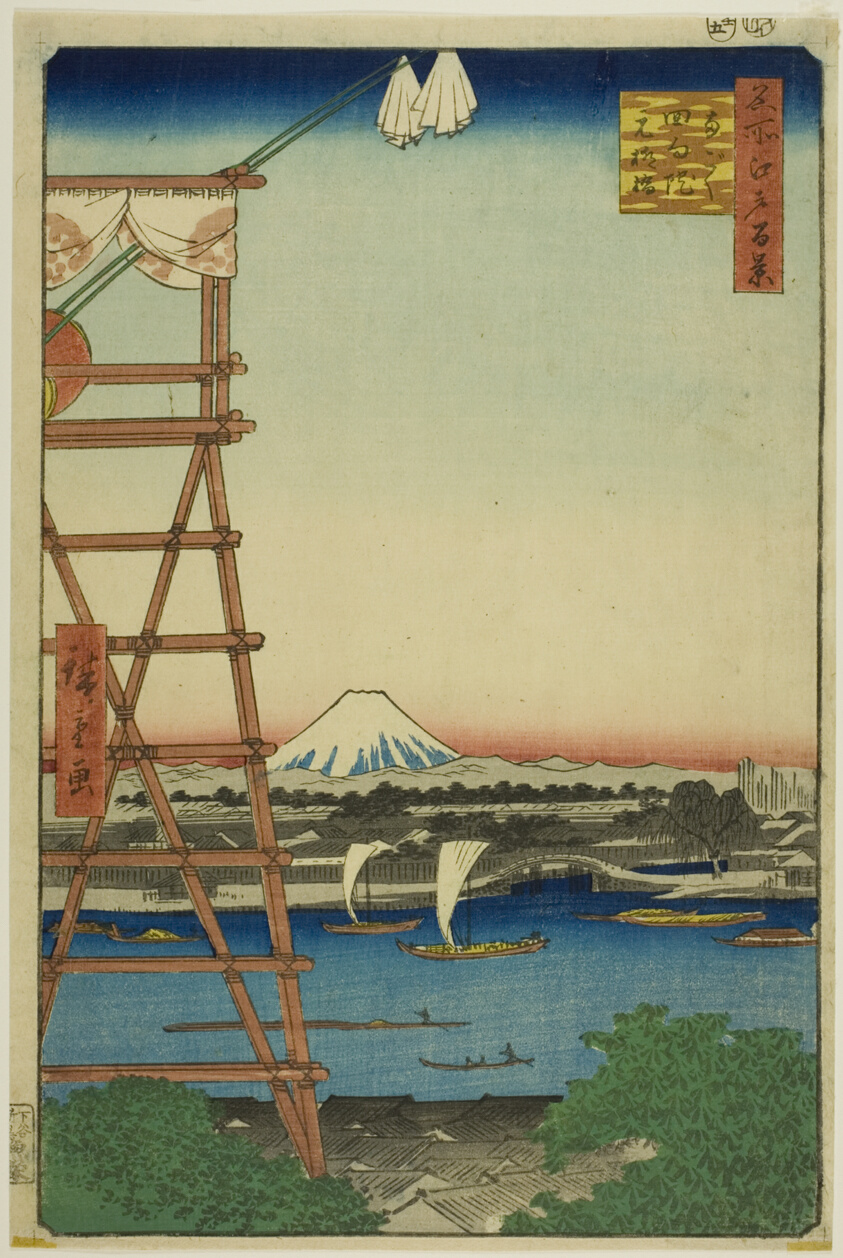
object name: Print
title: Ryogoku Ekoin and Moto-Yanagi Bridge (Ryogoku Ekoin Moto-Yanagibashi), from the series "One Hundred Famous Views of Edo (Meisho Edo hyakkei)"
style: Japanese (culture or style)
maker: Utagawa Hiroshige 歌川 広重; Japanese, 1797–1858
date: 1857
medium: Color woodblock print; oban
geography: Japan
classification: woodblock print; print